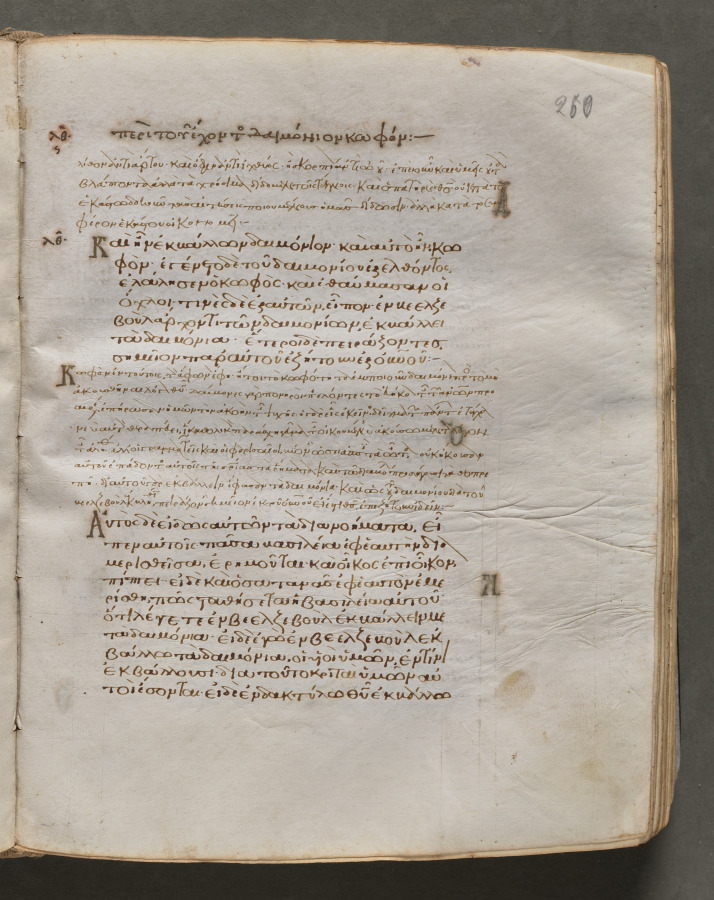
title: Text, folio 260 (recto), from a Gospel Book with Commentaries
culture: Byzantium, Constantinople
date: c. 1000–1100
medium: ink, tempera, and gold on vellum; leather binding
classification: Bound Volume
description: Each of the four gospels in this book opens on a page with brilliantly illuminated borders depicting the author of the text as well as birds—principally peacocks, symbols of the immortality of the soul—and fountains, representing the fountain of life and the salvation of the soul. This volume consists of 428 leaves with texts in Greek. Its level of sophistication suggests that it was probably written and decorated in a monastery in Constantinople.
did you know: Gospel books were carried in procession through Byzantine churches.